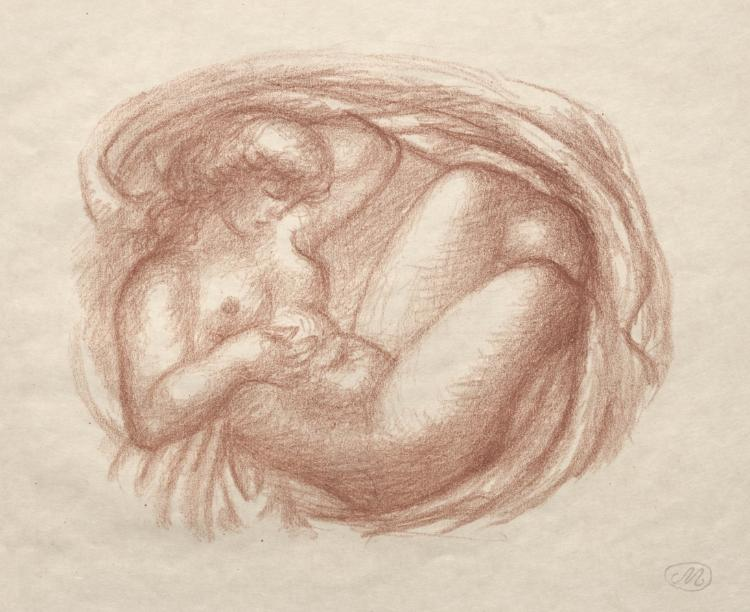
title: Reclining Nude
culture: France, 20th century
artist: Aristide Maillol (French, 1861–1944)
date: c. 1900–1944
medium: lithograph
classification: Print